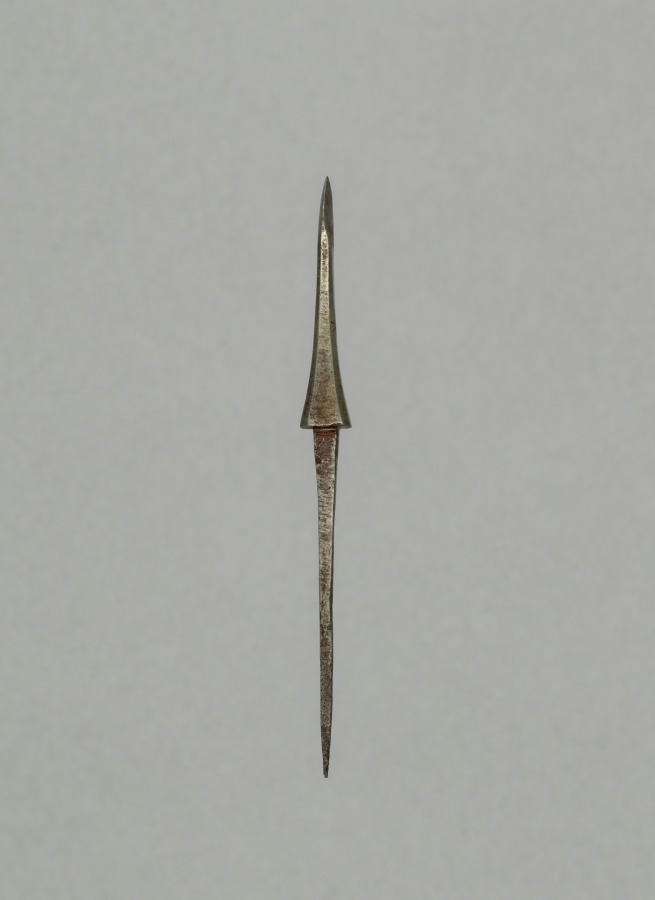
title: Arrow Point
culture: Japan, Edo period (1615–1868)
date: 1700s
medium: steel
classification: Arms and Armor